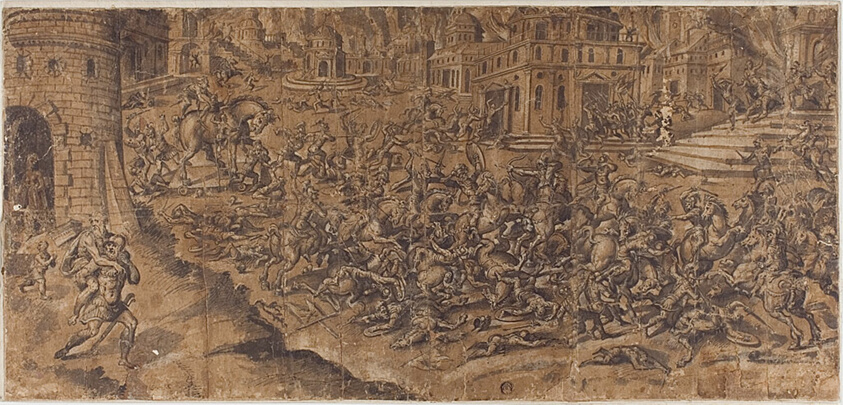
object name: Drawing and Watercolor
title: Aeneas Leaving the Burning City of Troy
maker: Unknown Artist; German, 16th century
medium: Pen and black ink, with brush and brown and gray wash, heightened with white gouache, over traces of black chalk, on tan laid paper, laid down on ivory laid paper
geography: Germany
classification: pen and ink drawings; drawings (visual works); prints and drawing